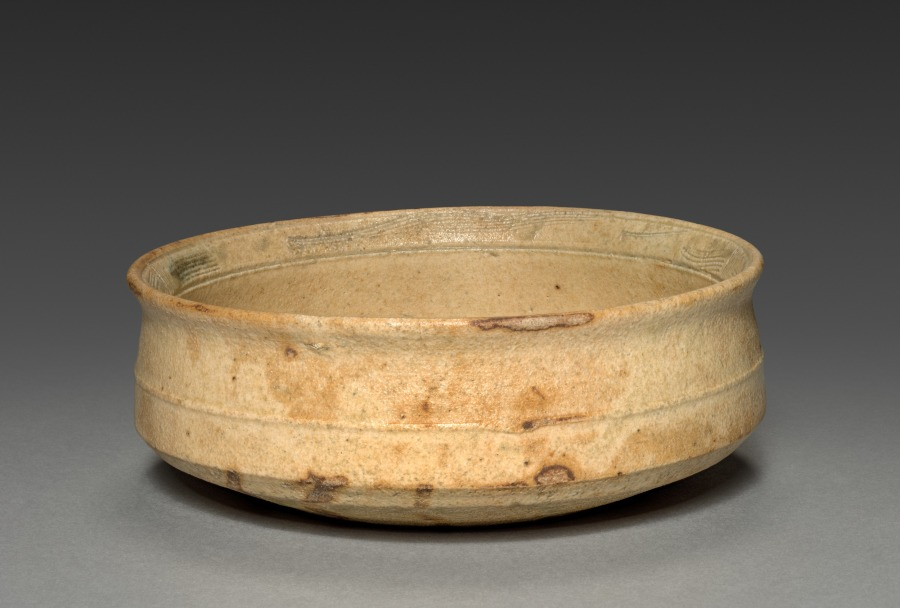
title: Bowl: Yellow Seto Ware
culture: Japan, Momoyama period (1573–1615)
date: c. 1590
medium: glazed stoneware with incised decoration (Seto ware)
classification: Ceramic